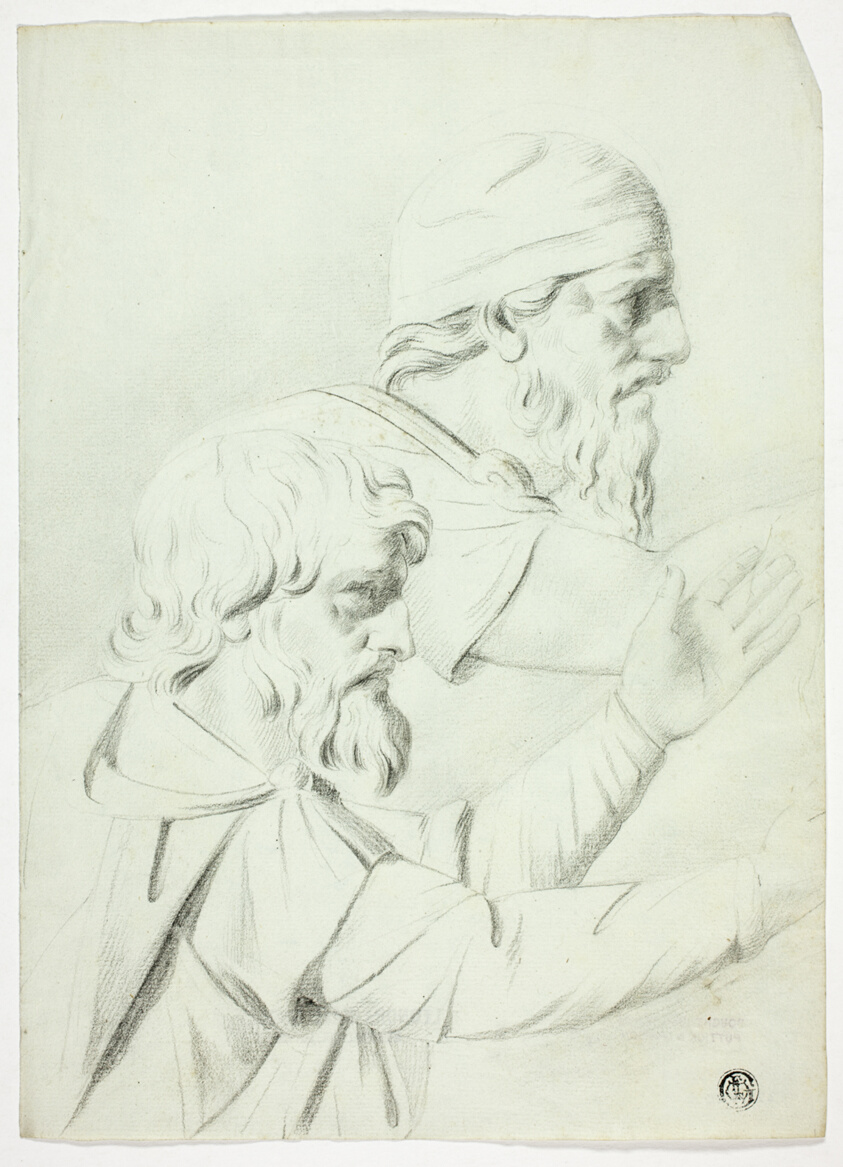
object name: Drawing and Watercolor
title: Two Men in Profile (from Bas Relief)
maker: John Downman (English, 1750-1824)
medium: Charcoal on pale blue laid paper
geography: England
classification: charcoal; drawings (visual works); prints and drawing